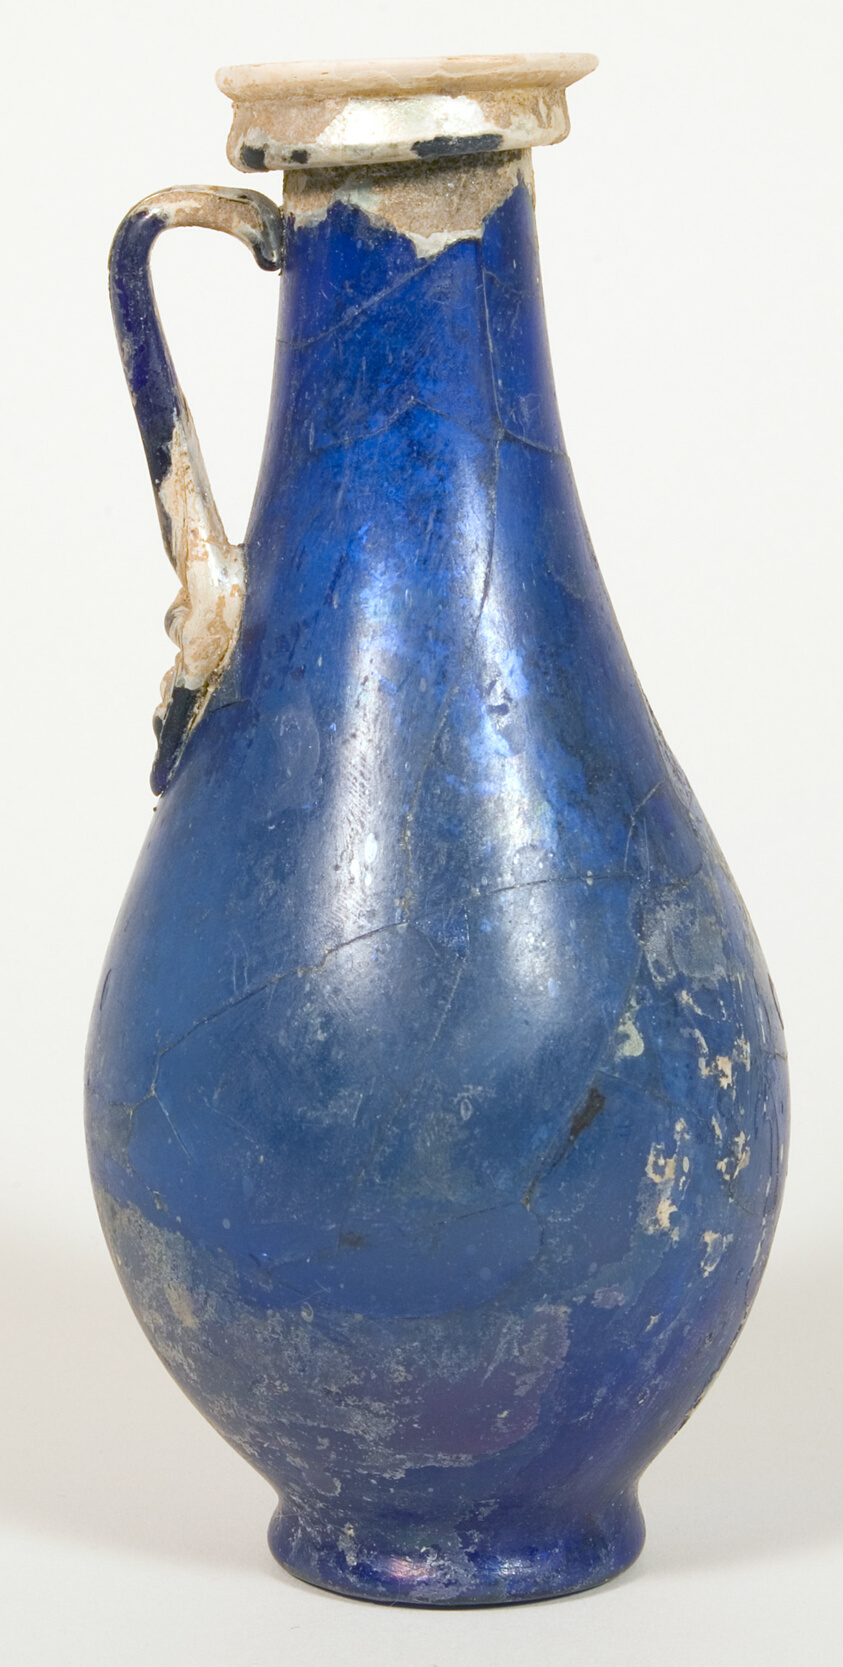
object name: Vessel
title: Jug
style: syrian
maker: Roman; Eastern Mediterranean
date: 3rd-4th century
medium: Glass, blown technique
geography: Syria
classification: vessel; glass; ancient art